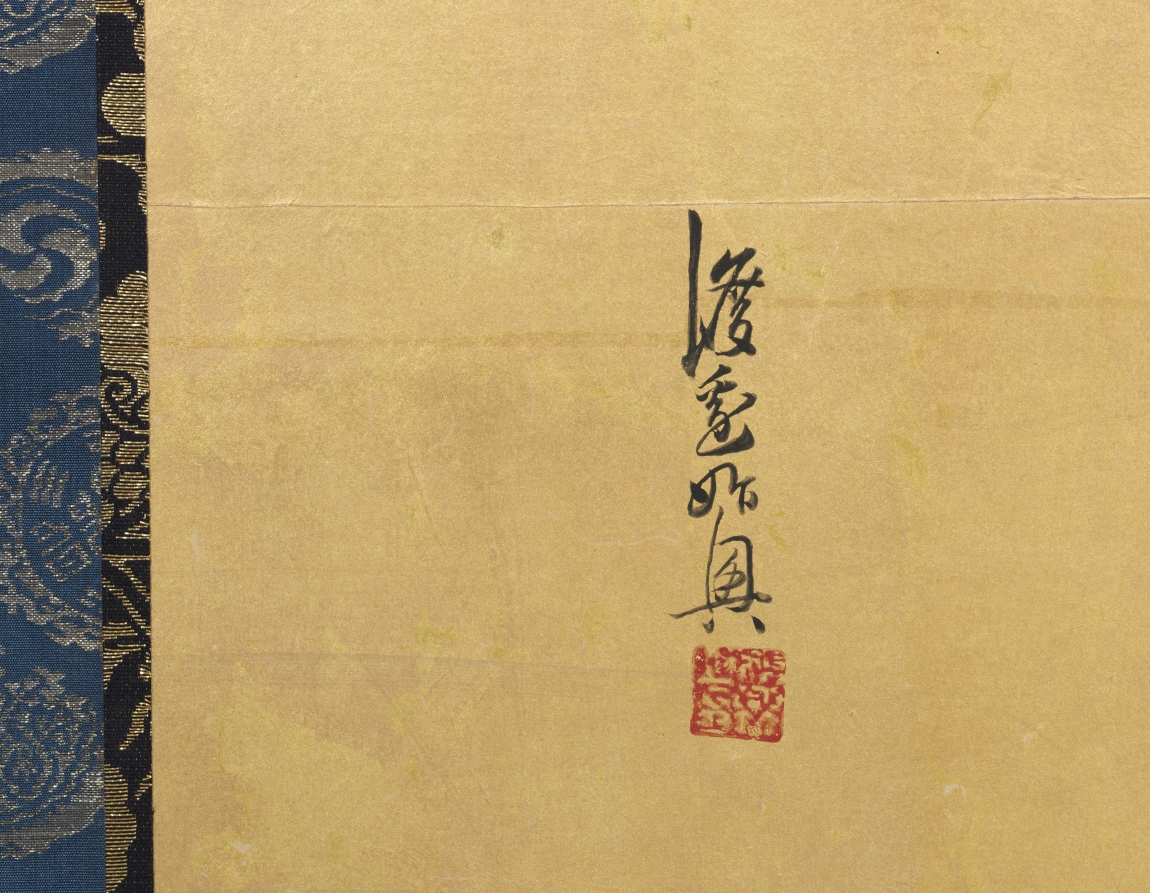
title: Irises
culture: Japan, Edo period (1615–1868)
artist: Watanabe Shikō (Japanese, 1683–1755)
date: 1700s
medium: One of a pair of six-panel folding screens, ink and color on gilded paper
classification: Painting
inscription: signed and sealed lower right of the first panel from the right.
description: The subject of this painting comes from a 10th-century text. It tells of a young nobleman’s journey into the lonely countryside, far from the capital city of Heian-kyō (Kyoto). There he came upon a small stream, the banks of which were covered with blooming irises, on which the artist has chosen to focus our attention. While viewing the beautiful flowers the nobleman composed a poem: I have a beloved wife, Familiar as the skirt of a well-worn robe, And so this distant journeying Fills my heart with grief.